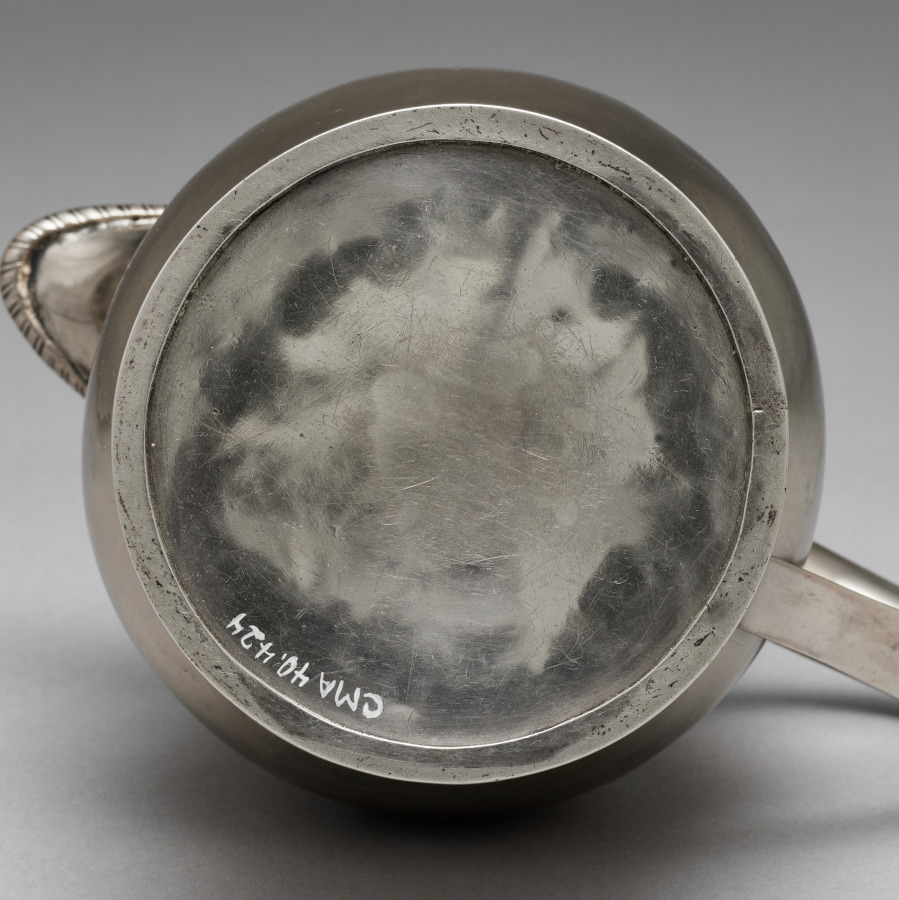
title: Pitcher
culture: America, probably Massachusetts, 19th century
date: 1800–1810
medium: silver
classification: Silver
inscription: Engraved on front side: "C".